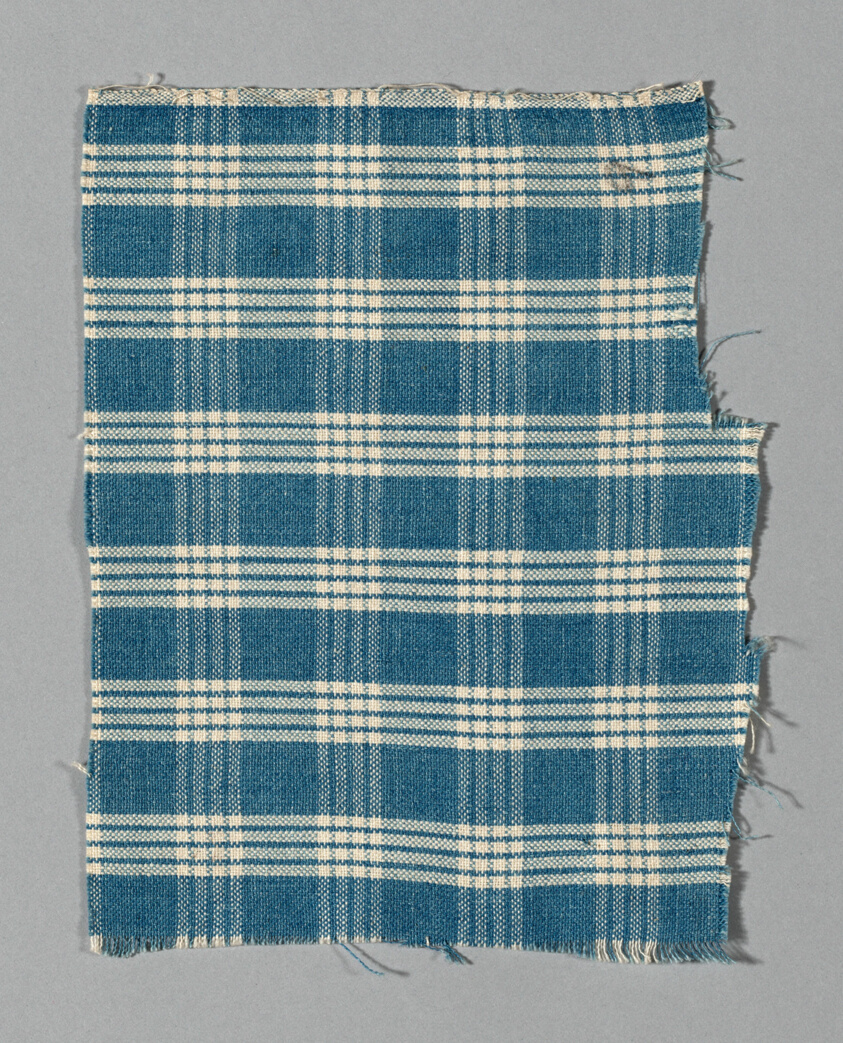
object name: Textile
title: Fragment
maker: United States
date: early 19th century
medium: Sample of stripe and check patterns of blue, white and tan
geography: United States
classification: textile; weaving